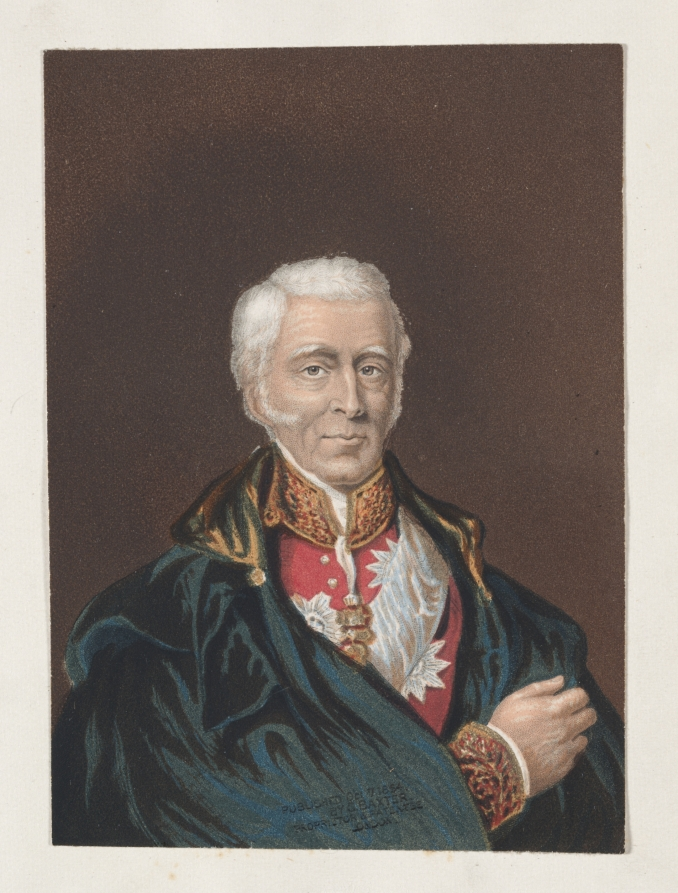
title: Arthur Wellesley, Duke of Wellington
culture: England, 19th century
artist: George Baxter (British, 1804–1867)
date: 1854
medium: Baxter process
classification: Print